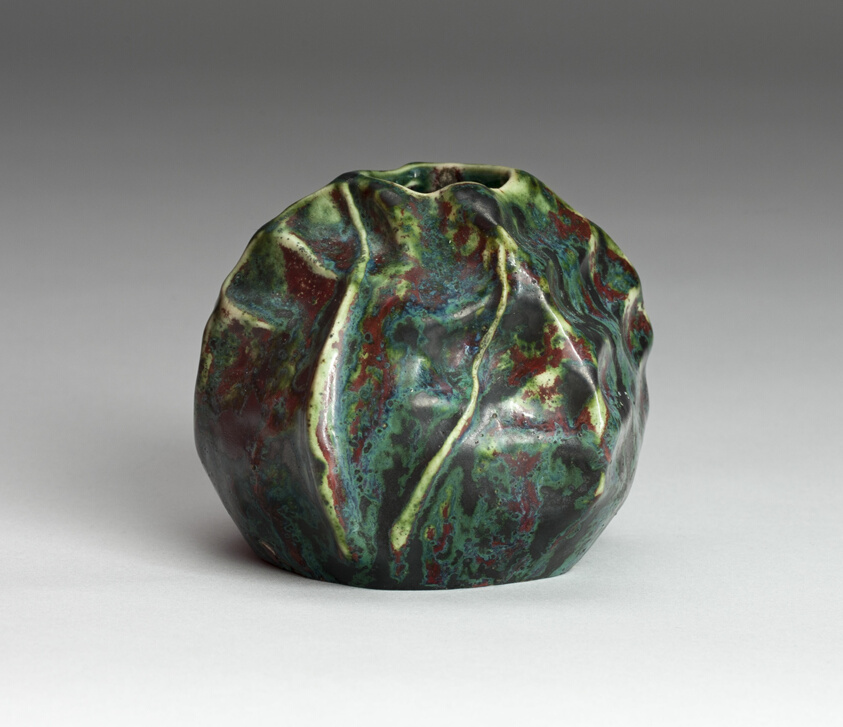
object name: Ceramics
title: Shell-Form Vase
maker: Pierre Adrien Dalpayrat; French, 1844-1910; Bourg-la-Reine, France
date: c. 1900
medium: Glazed stoneware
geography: France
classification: vase; vessel; ceramics